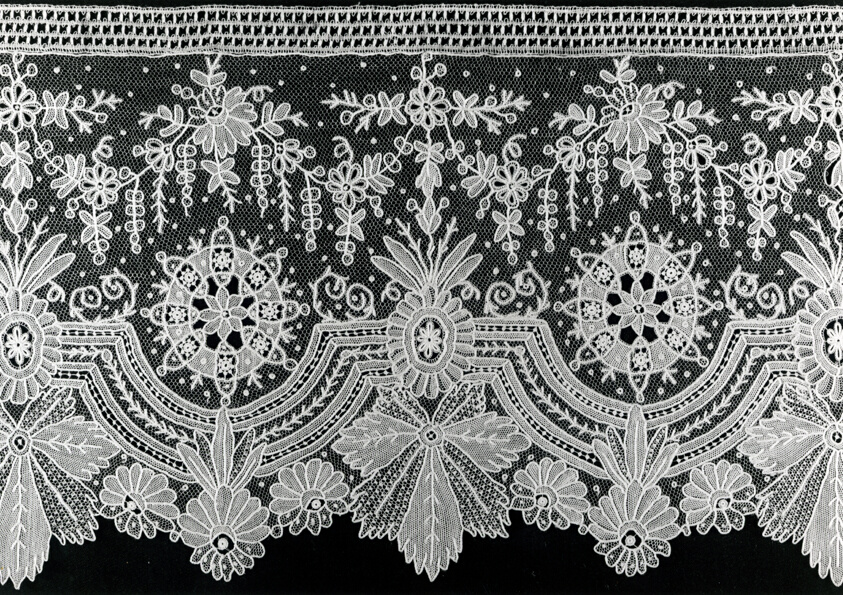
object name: Textile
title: Border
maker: Belgium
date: 1875/1900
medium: Cotton, needle lace of a type known as "Point de Gaze"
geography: Belgium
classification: textile; lace - needle; lace